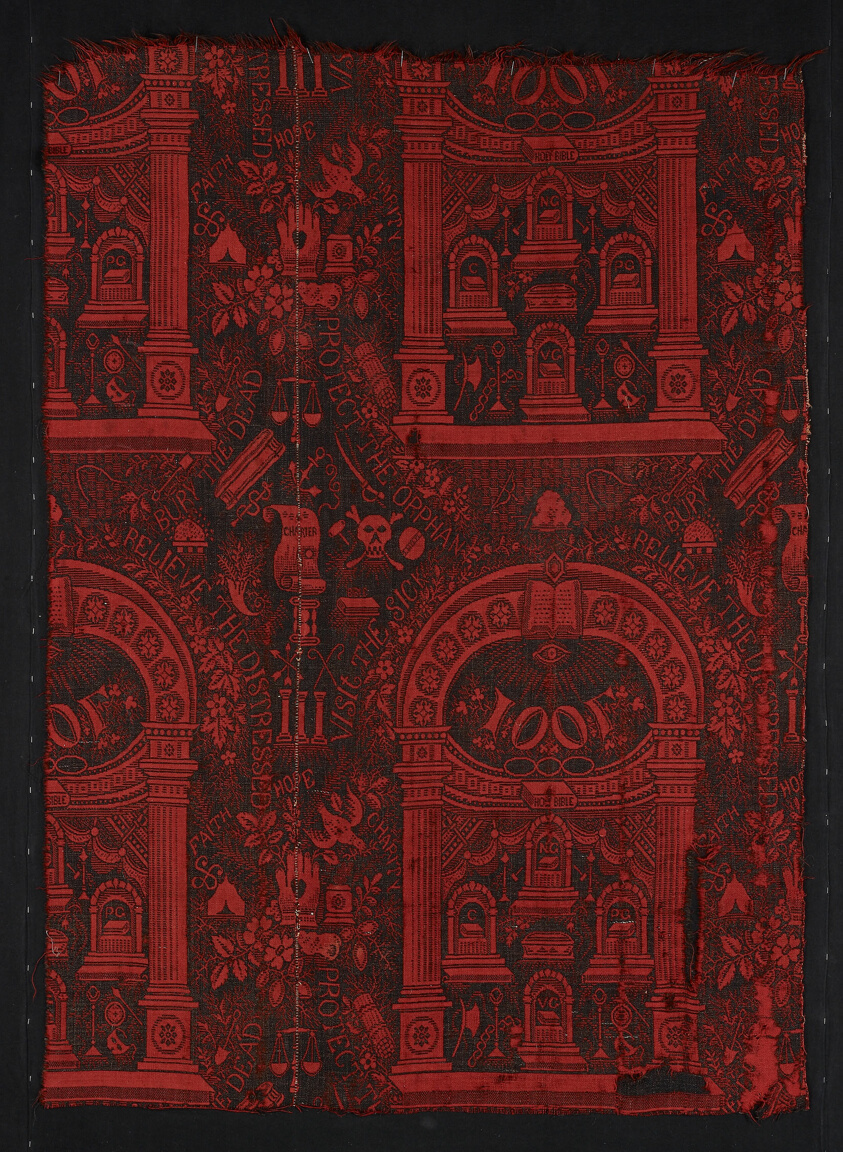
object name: Textile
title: Carpet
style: Folk Art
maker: United States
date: 1880/90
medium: Wool, plain weave; double cloth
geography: United States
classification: weaving - carpet; textile